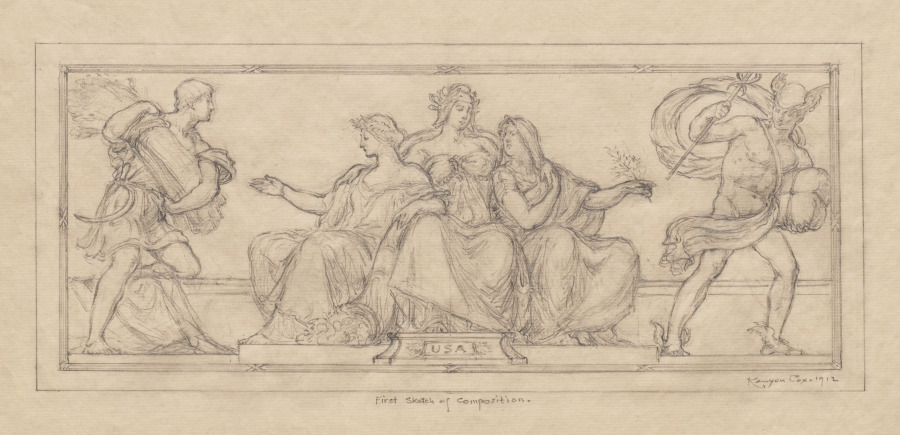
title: Design for United States Currency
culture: America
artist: Kenyon Cox (American, 1856–1919)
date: 1912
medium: graphite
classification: Drawing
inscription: signed, lower right, in graphite: Kenyon Cox. 1912 ; by artist, lower center, in graphite; First Sketch of Composition. ; by unknown hand, lower right, in graphite: 11 x 19 1/2 15 x 23 1/2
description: The painter and muralist Kenyon Cox viewed himself as the heir to the great traditions of the Italian Renaissance and vigorously led the resistance to all forms of modern painting. This design for U. S. currency, which was rejected by the government, shows the care with which he planned his compositions. Cox's son, Allyn, who also became a successful mural painter, posed for the male figure. Cox's brother, J. D. Cox, a prominent civic leader in Cleveland, played an active role in the formation of the Cleveland Museum of Art. He gave the museum the three works by his brother that are in this exhibition.